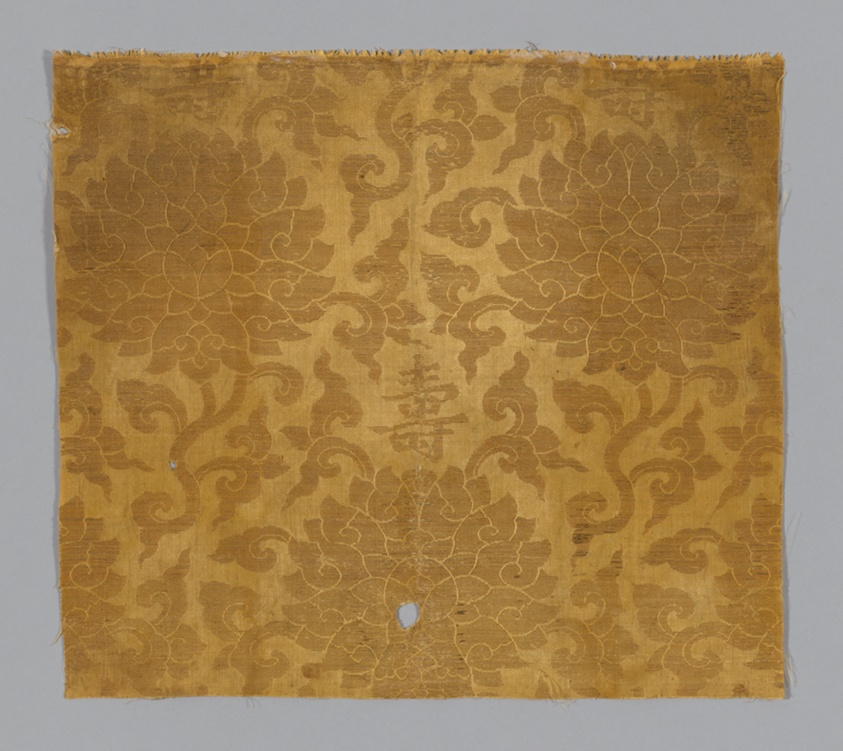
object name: Textile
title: Fragment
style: edo (japanese period)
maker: Japan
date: 18th century, Edo period (1615–1868)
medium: Plain compound satin, silk and gilt paper; 3 strips to m.m.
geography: Japan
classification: textile; weaving